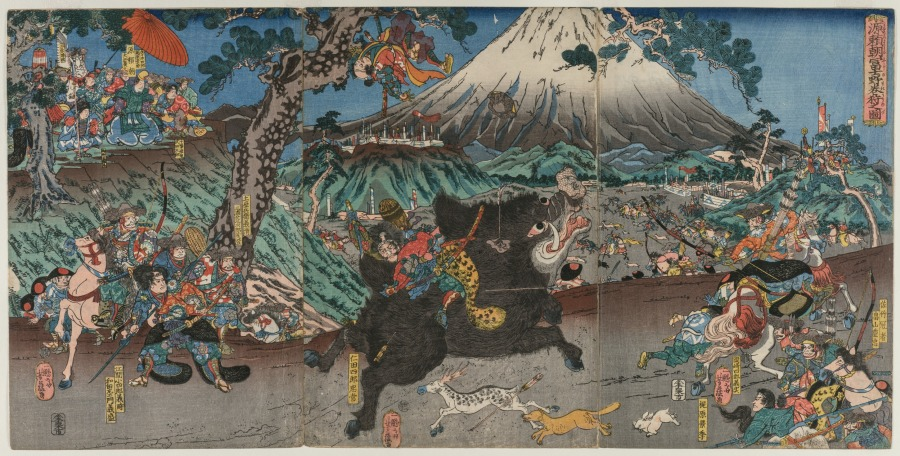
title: Picture of Minamoto no Yoritomo's Hunt on the Slopes of Mount Fuji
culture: Japan, Edo period (1615–1868)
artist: Utagawa Yoshifuji (Japanese, 1828–1887)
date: mid 1840s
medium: color woodblock print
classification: Print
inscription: Signature: Ipposai Yoshifuji ga Publisher: Izumiya Ichibei (Senichi han) Censorship Seal: Wata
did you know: The print designer’s name is in a red form on each of the three prints forming this composition, while the names of important figures pictured are in yellow rectangles.